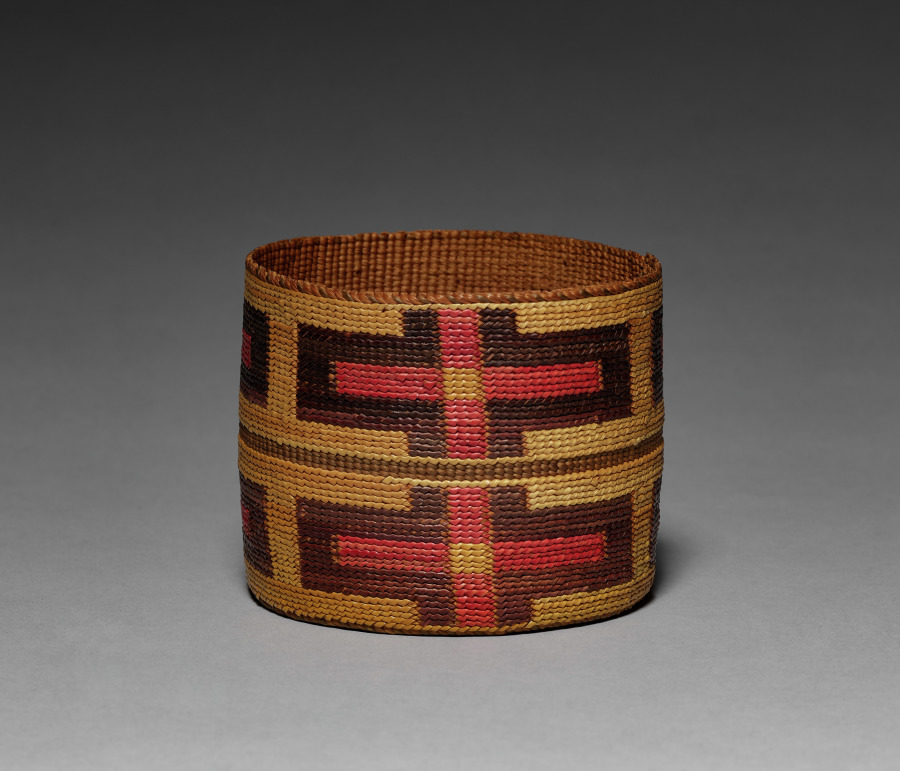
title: Telescoping basket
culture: Northwest Coast, Tlingit, 19th century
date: 1800's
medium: twined spruce root with grass false embroidery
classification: Basketry